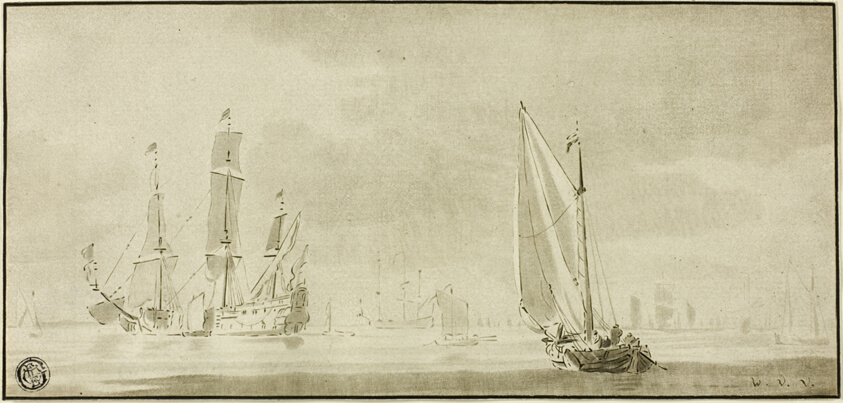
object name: Drawing and Watercolor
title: Galleons and Sailboats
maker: Willem van de Velde, II (Dutch, 1633-1707)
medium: Brush and gray wash on ivory laid paper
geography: Holland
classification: ink or chalk wash; drawings (visual works); prints and drawing